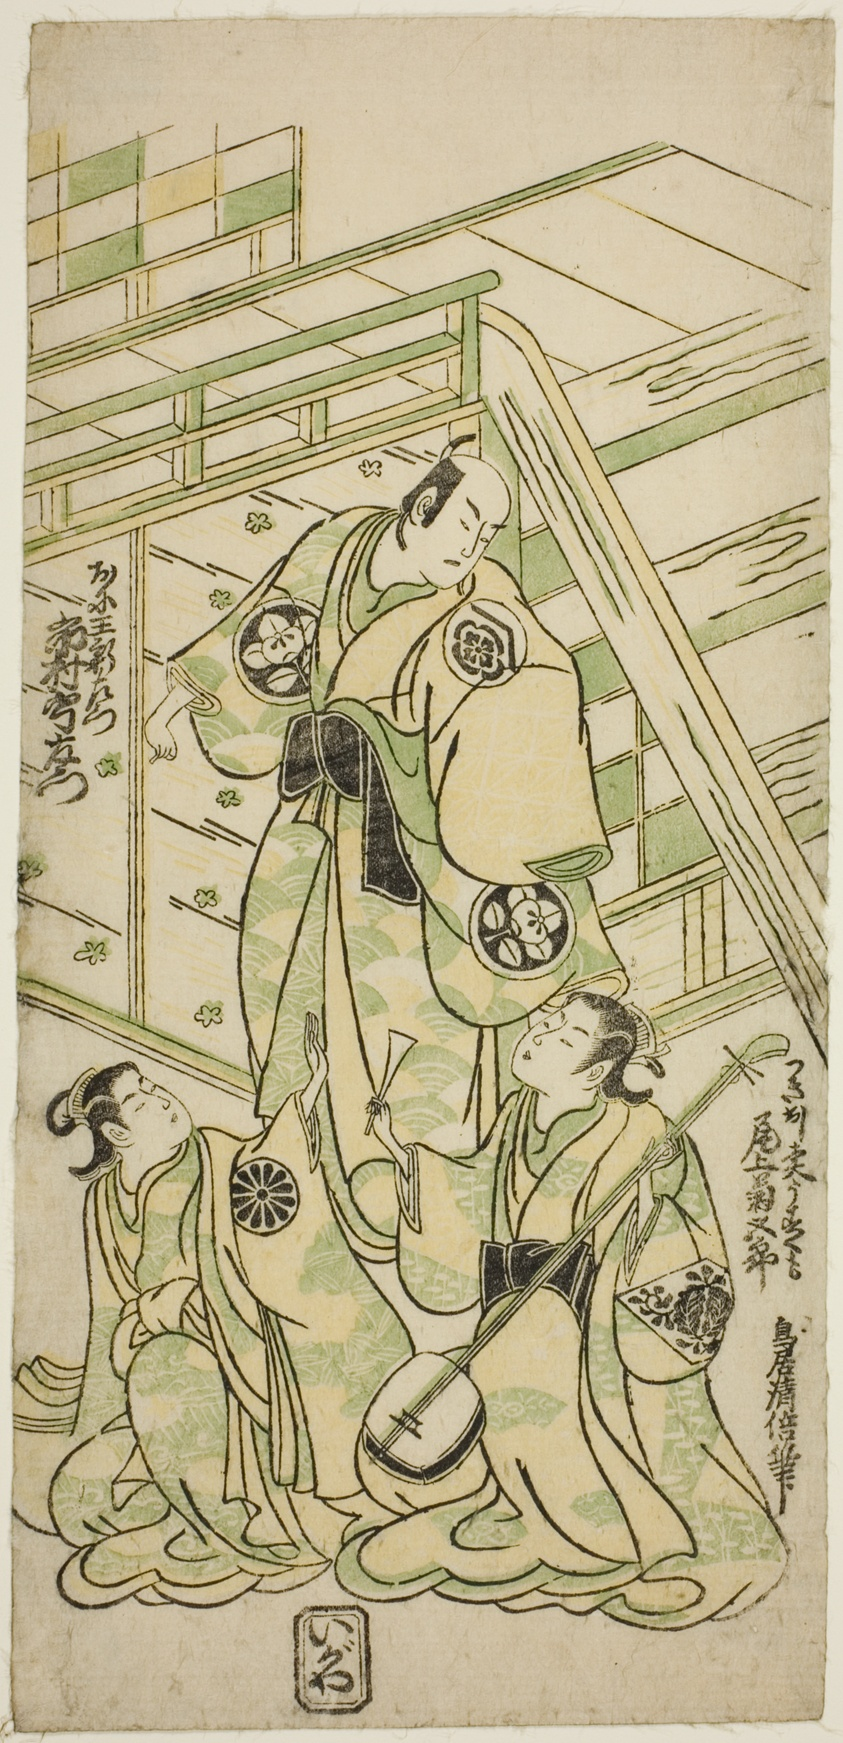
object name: Print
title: The Actors Ichimura Uzaemon VIII as Onio Shinzaemon and Onoe Kikugoro I as the courtesan Usugumo in the play "Nanakusa Wakayagi Soga," performed at the Ichimura Theater in the first month, 1744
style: Japanese (culture or style)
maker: Torii Kiyomasu II (Japanese, 1706 (?)–1763 (?))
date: 1744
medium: Color woodblock print; hosoban, benizuri-e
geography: Japan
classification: woodblock print; print; asian art